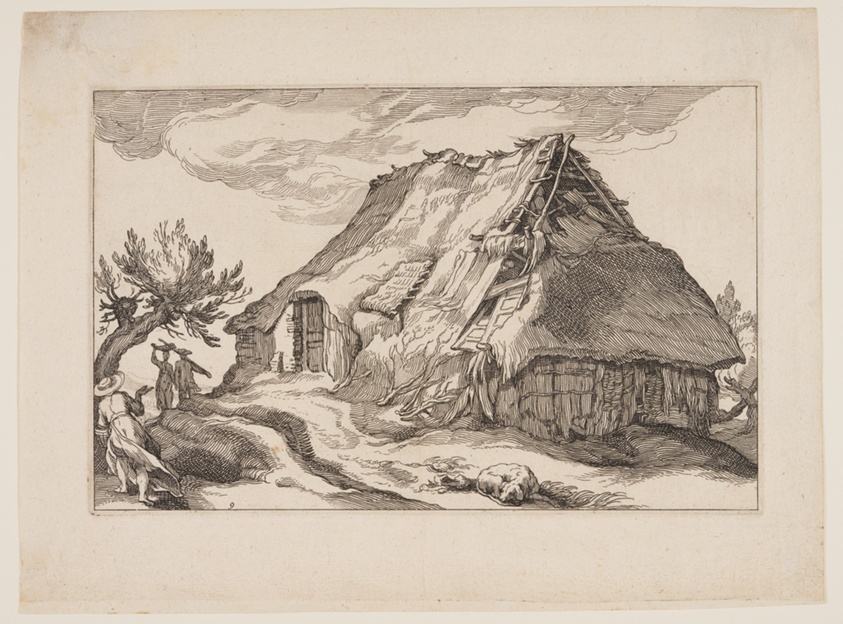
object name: Print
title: Plate 9, from Landscapes with Farmhouses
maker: Boëtius Adamsz. Bolswert (Flemish, 1580–1633); after Abraham Bloemaert (Dutch, 1566–1651)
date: 1614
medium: Etching on ivory laid paper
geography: Flanders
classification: print; paper; prints and drawing; etching